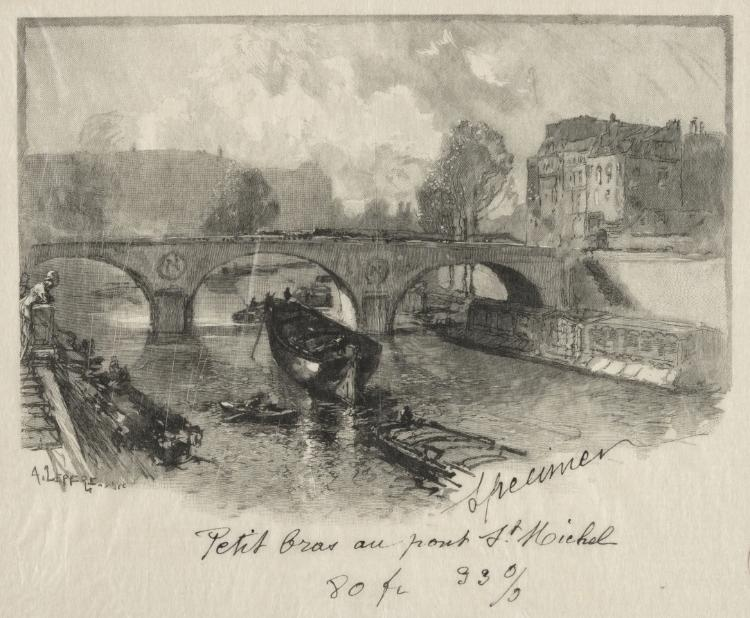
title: Petit bras au Pont St. Michel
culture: France, 19th-20th century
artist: Auguste Louis Lepère (French, 1849–1918)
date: 1891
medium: wood engraving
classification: Print